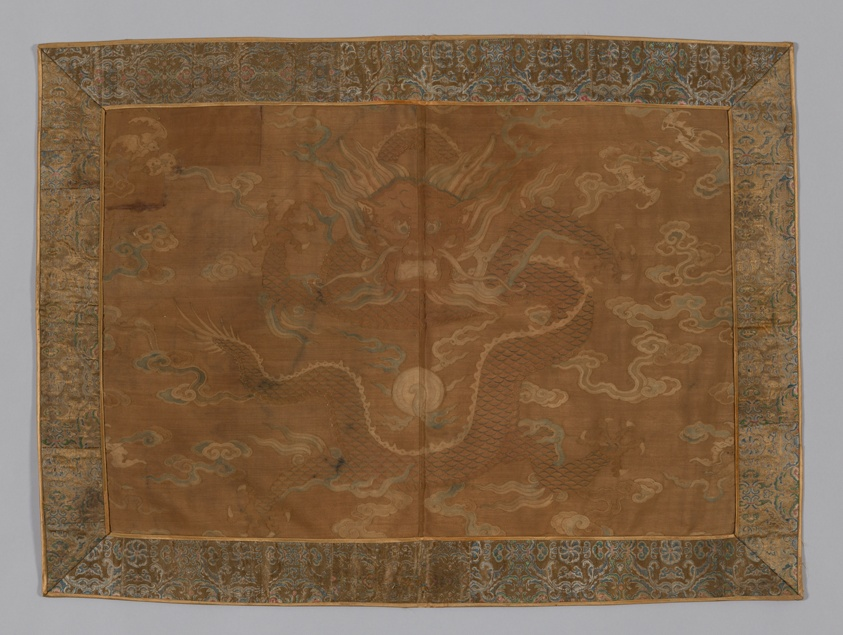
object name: Textile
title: Panel (Former Fragment of Man's Coat)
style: qing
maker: Manchu (China)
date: Qing dynasty(1644–1911), 1700/35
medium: Center: silk, slit tapestry weave with eccentric and interlaced outlining wefts; painted; border: silk, warp-float faced 5:1 satin weave with weft-float faced 1:2 twill interlacings of secondary binding warp-float faced 7:1 satin weave; lined with silk, 3:1 twill damask weave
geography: China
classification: textile; weaving